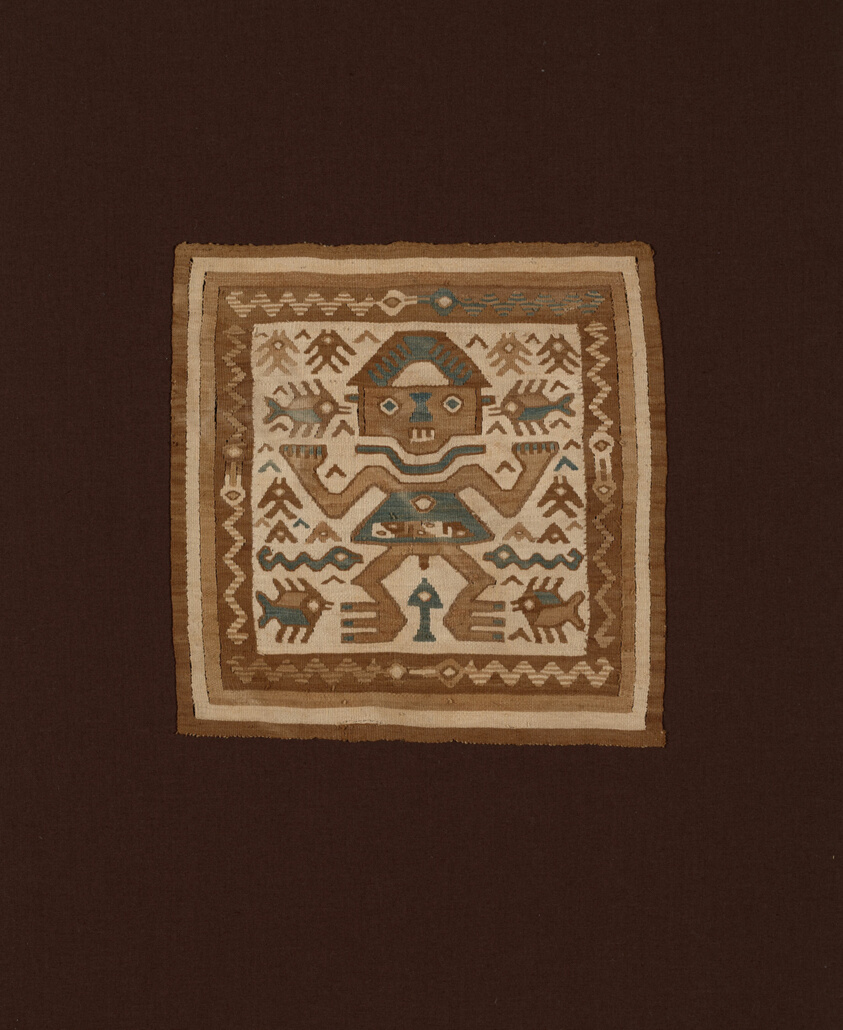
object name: Textile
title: Panel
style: Pre-Columbian, chancay, late intermediate period, americas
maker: Rimac (North coast, Peru)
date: 1000/1476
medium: Cotton, slit, dovetailed, and single and double interlocking tapestry weaves with eccentric and outlining wefts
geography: Peru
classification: textile; weaving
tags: super/natural